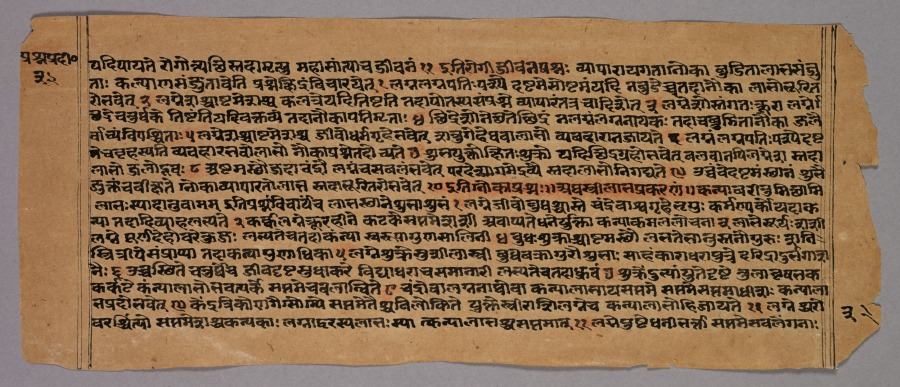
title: Page from the Prasnapradipa, a Hindu Astrology Text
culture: Western India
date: 1500s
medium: ink on paper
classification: Manuscript